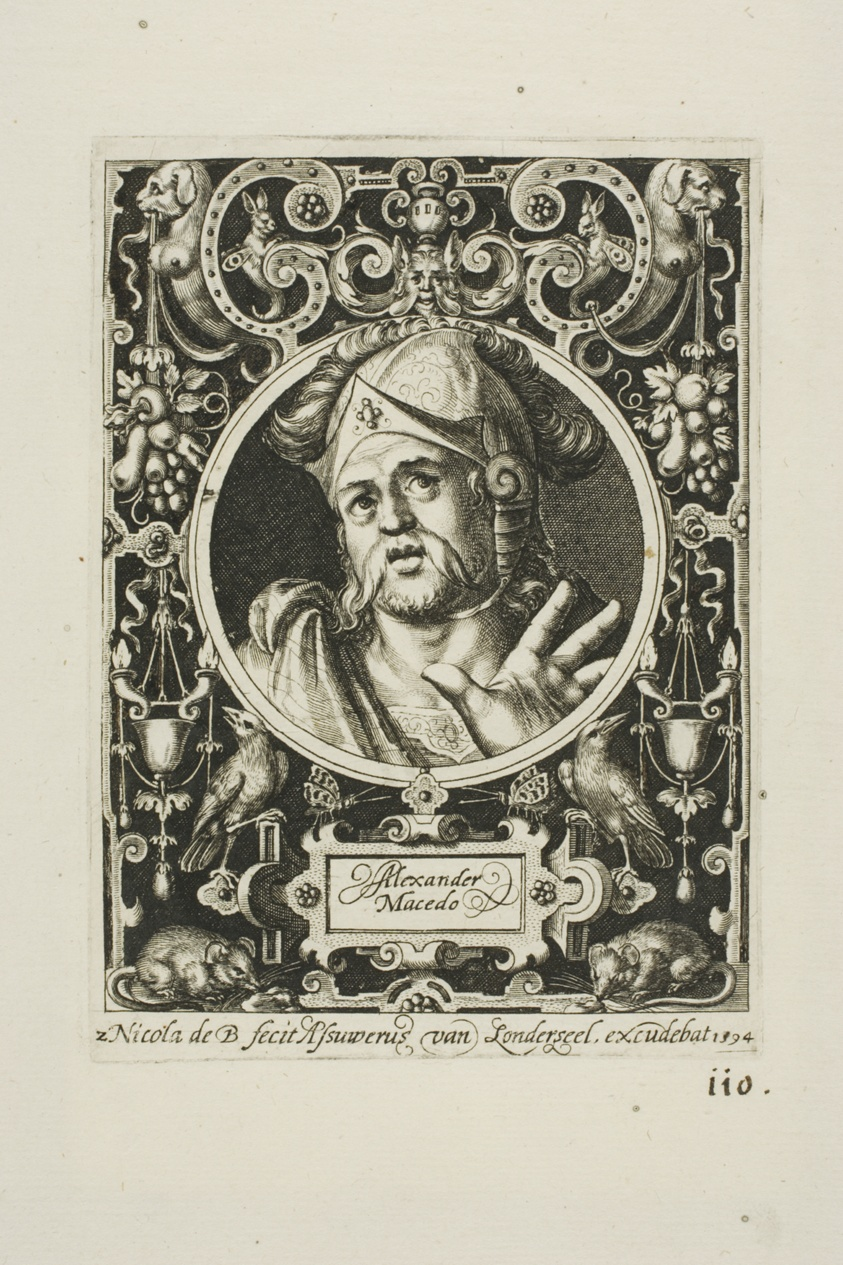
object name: Print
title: Alexander the Great, plate two from The Nine Worthies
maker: Nicolaes de Bruyn (Flemish, 1571-1656); published by Assuerus van Londerseel (Flemish, 1572-1635)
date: 1594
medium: Engraving in black on cream laid paper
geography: Flanders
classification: engraving; prints and drawing; print